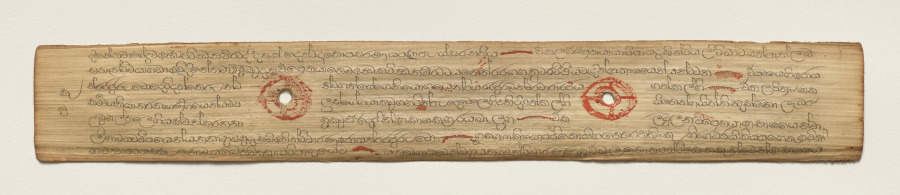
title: Leaf from a Buddhist Manuscript (recto)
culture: Sri Lanka, Singhalese, Late 17th century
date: c. 1700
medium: fiber paper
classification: Manuscript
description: Palm leaf material is still used for manuscripts in Sri Lanka. The palm leaves are prepared first by boiling them, drying them in the sun, and then rubbing them with oils. Scribes then use a metal stylus to incise the text. Then charcoal powder is wiped across the pages, filling in only the inscribed lines.